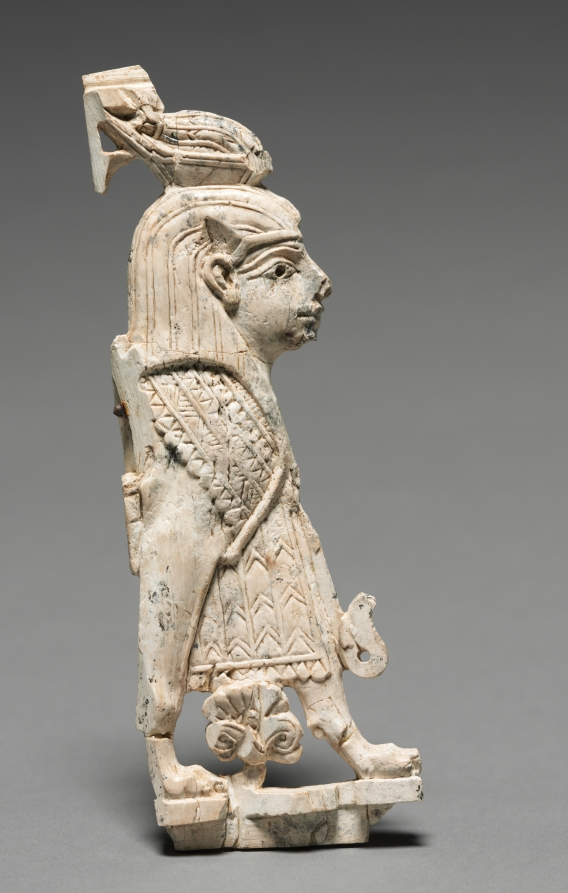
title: Decorative Plaque: Winged Sphinx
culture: Phoenicia, Iraq, Nimrud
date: 900–800 BCE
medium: ivory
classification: Ivory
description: This small plaque was executed in the Phoenician style with symmetrical compositions, elongated figural proportions, and Egyptian subjects and motifs. Examples have been found throughout the Middle East, but thousands come from Nimrud where most were excavated in the storerooms of a military arsenal built by King Shalmaneser II (858-824 bc). When the Nimrud palace was sacked in the 7th century bc, these ivories were thrown into a well, where Sir Max Mallowan (the husband of Agatha Christie) discovered them in 1951. The monumental wall relief (1943.246) was found at the same Assyrian palace at Nimrud.